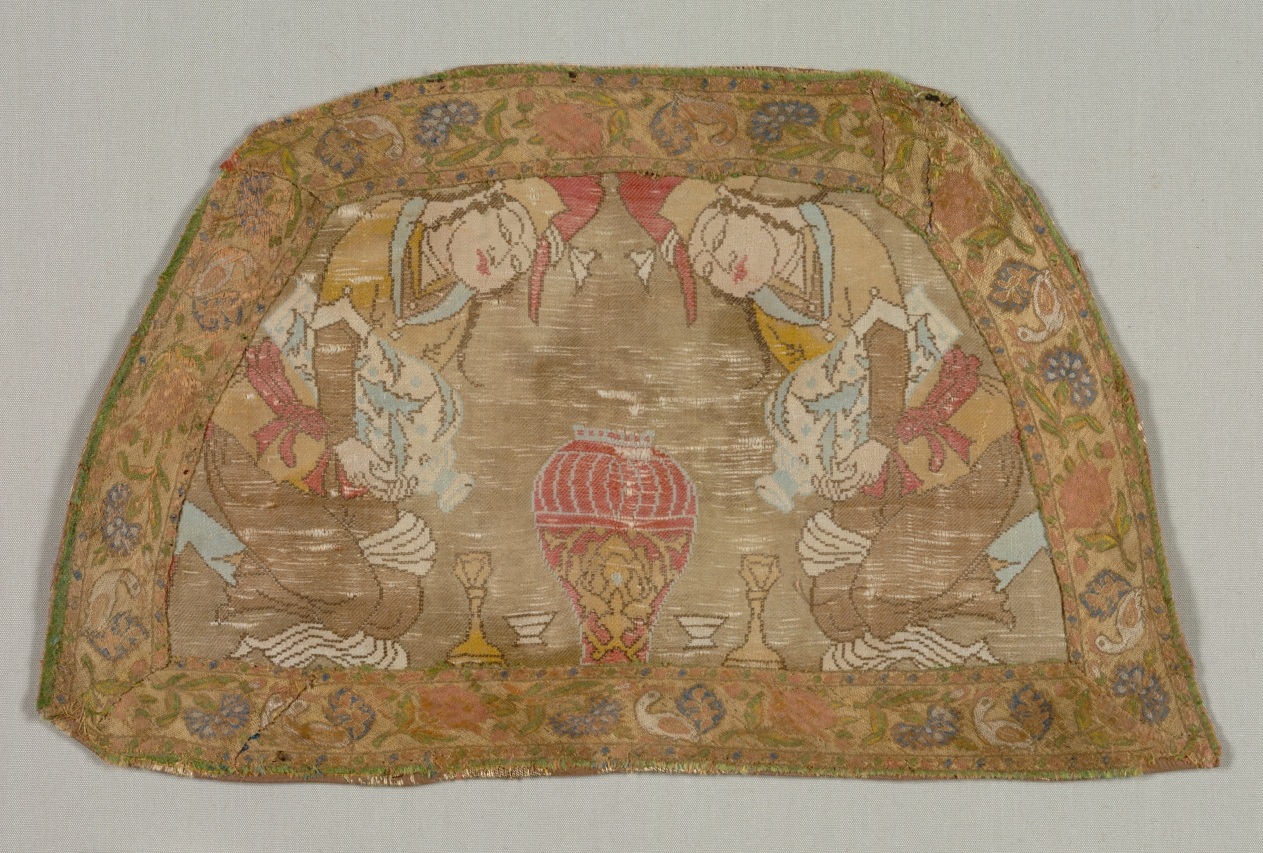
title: Fragment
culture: Iran, Safavid period (1501–1722)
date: 1600s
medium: silk: compound twill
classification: Textile